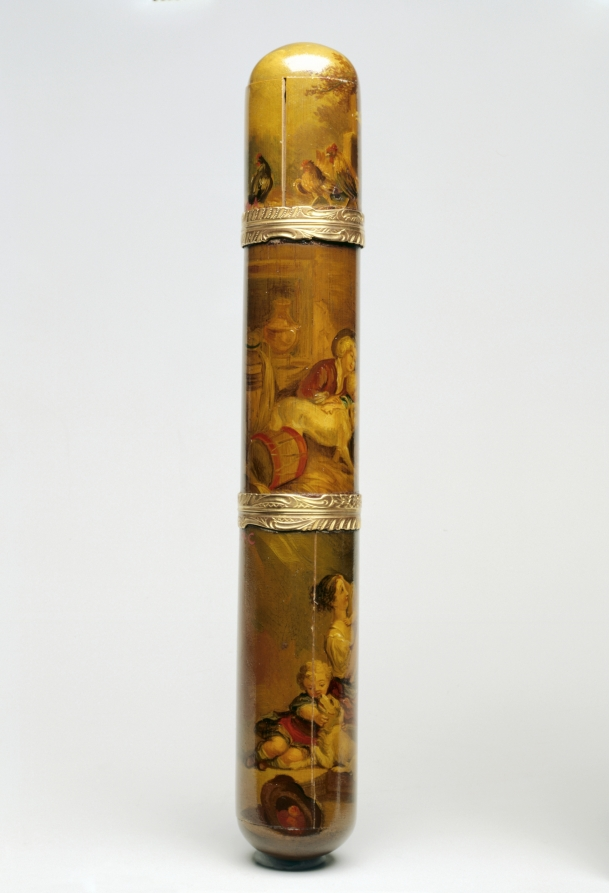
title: Perfume Case (Etui flaconnier)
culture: France, 18th century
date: c. 1780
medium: painted wood with gilt metal mounts, tortoiseshell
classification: Cosmetic Objects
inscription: Unmarked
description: Resting inside this case is a small octagonal crystal flask that would have held perfume. The painted miniatures are decorated with vernis martin, a popular varnish that imitated East Asian true lacquer. These scenes of rural merriment were often miniature reproductions of well-respected artists of the period. The depiction of three children and a dog on the lower portion of the case was drawn from Jean-Honoré Fragonard’s The Happy Family (L’heureuse fécondité) (1777).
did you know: Perfume was an important part of the French toilette, a lengthy ritual of washing and dressing practiced by members of the French social elite.